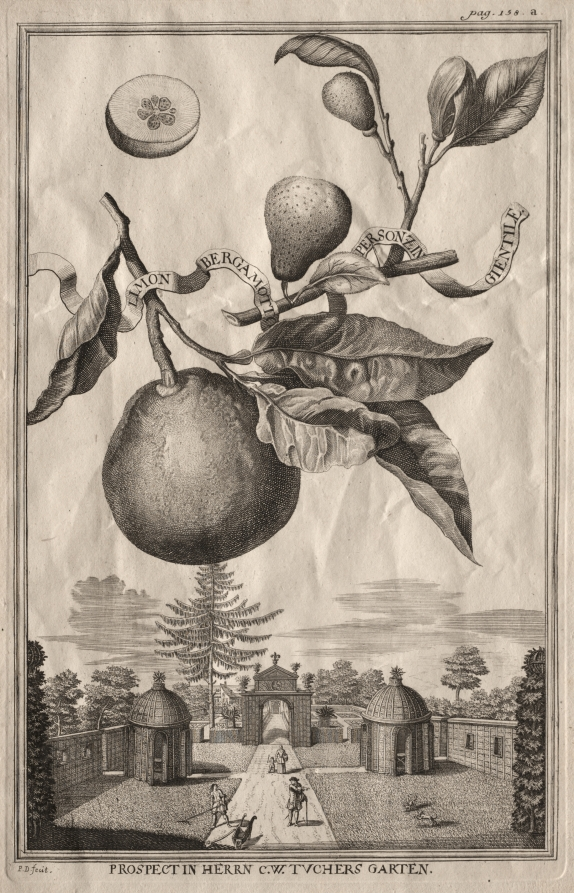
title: Nurnbergische Hesperides: Limon bergamotto personzin gientile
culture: Hungary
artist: Joseph de Montalegre (Hungarian)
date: 1714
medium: etching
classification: Print